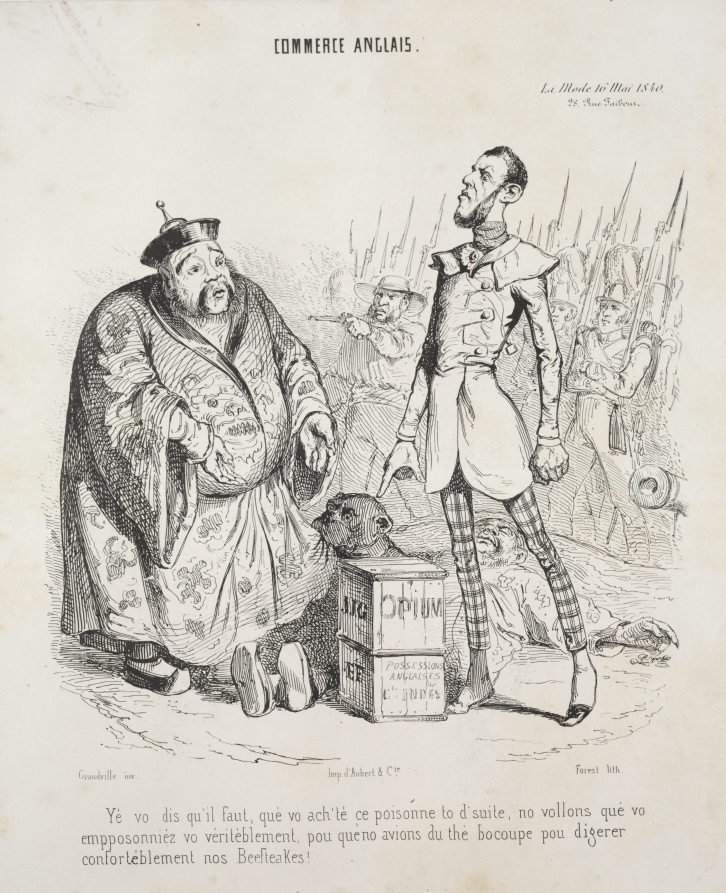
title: Commerce anglais. Yé vo dis qu'il faut, que vo ach'te ce poisonne to d'suite, no vollons que vo empposonniez vo véritéblement, pou que'no avions du thé bocoupe pou digerer conforteblément nos Beefteakes!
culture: France, 19th century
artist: Jean-Jacques Grandville (French, 1803–1847)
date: 1840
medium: lithograph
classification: Print